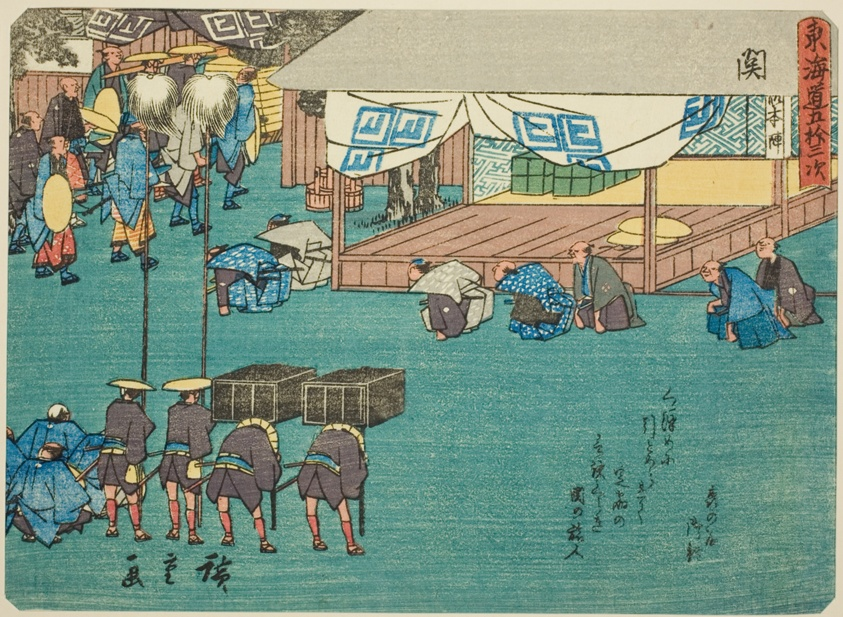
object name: Print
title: Seki, from the series "Fifty-three Stations of the Tokaido (Tokaido gojusan tsugi)," also known as the Tokaido with Poem (Kyoka iri Tokaido)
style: Japanese (culture or style)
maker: Utagawa Hiroshige 歌川 広重; Japanese, 1797-1858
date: c. 1837/42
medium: Color woodblock print; chuban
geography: Japan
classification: woodblock print; print; asian art